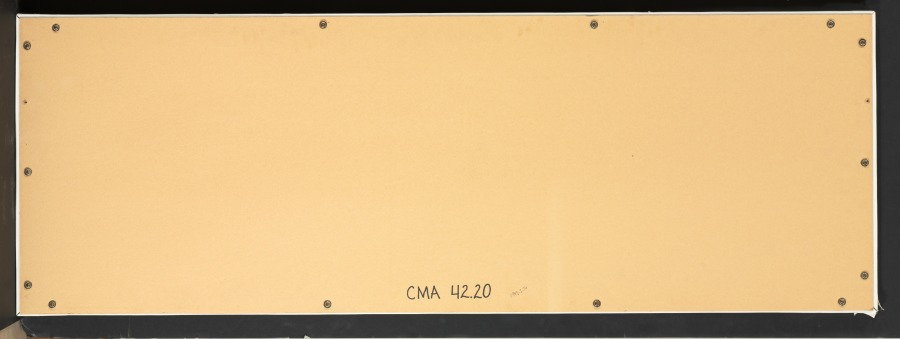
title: Overdoor Painting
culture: France, 18th century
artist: Pierre Rousseau (French, 1751–1829)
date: 1790s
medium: oil on canvas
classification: Painting